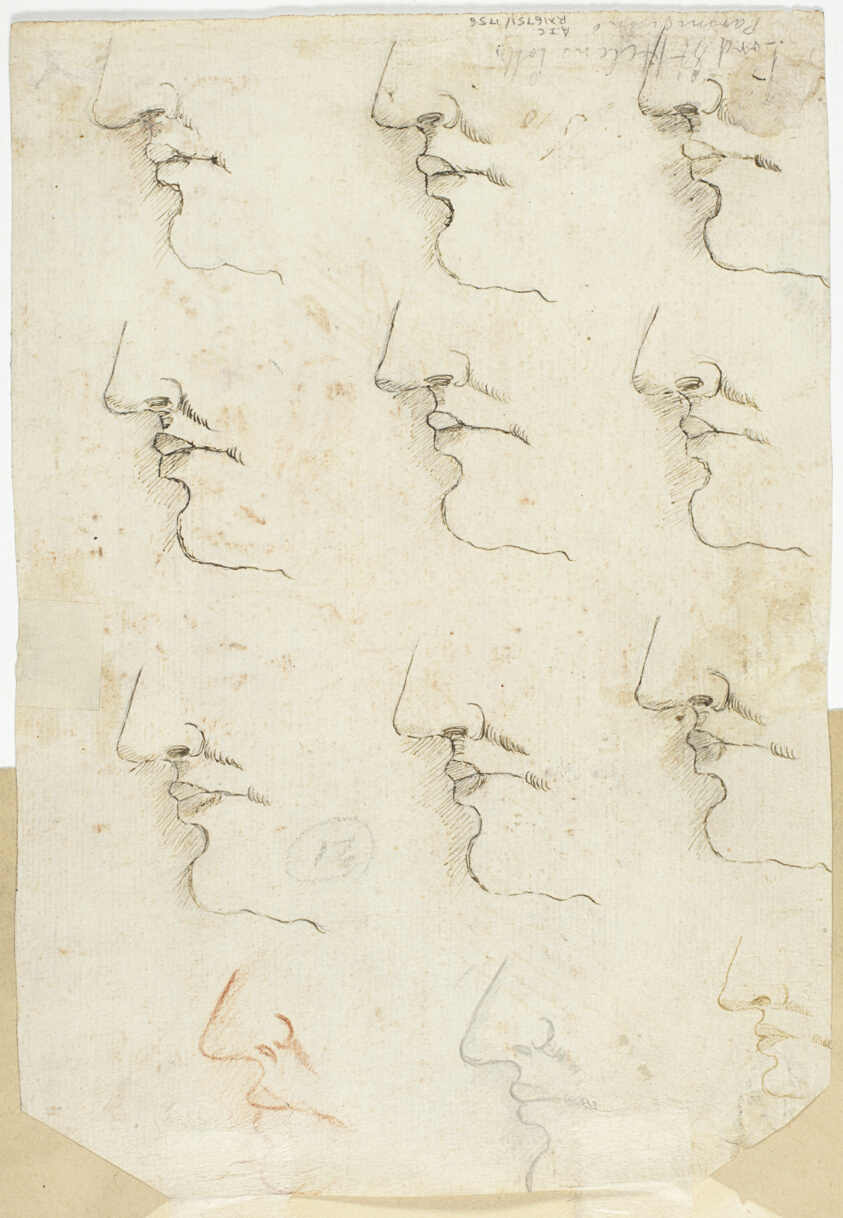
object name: Drawing and Watercolor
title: Marriage of the Virgin (recto); Sketches of Lower Half of Face in Profile (verso)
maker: Unknown Artist (French, n.d.); or after Parmigianino (Italian, 1503-1540); or style of Cristoforo Roncalli (Italian, 1552-1626)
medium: Red chalk on gray prepared ground (recto) and pen and brown ink over graphite (verso) on ivory laid paper, tipped onto tan wove paper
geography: France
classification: chalk; drawings (visual works); prints and drawing